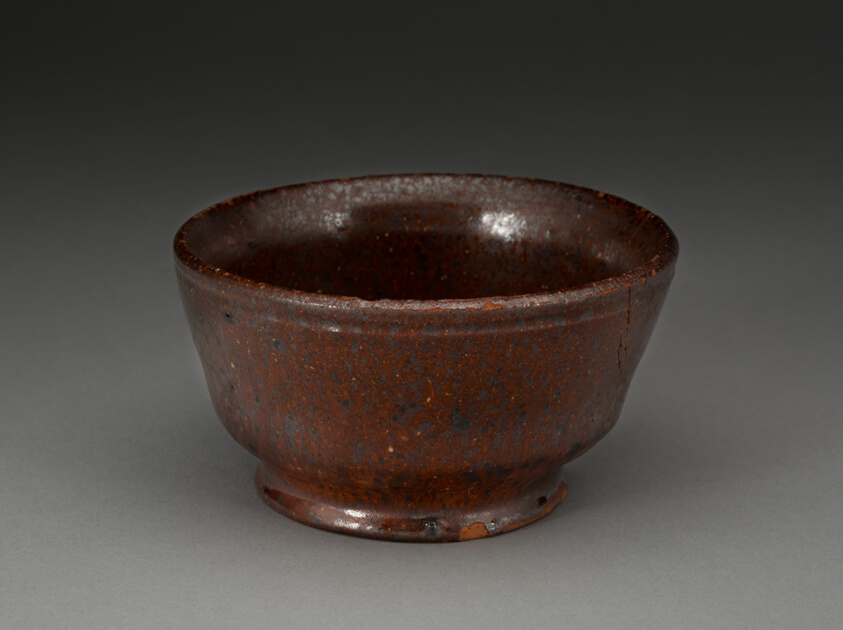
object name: Ceramics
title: Bowl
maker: Artist unknown (American, 19th century); Pennsylvania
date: 1810–50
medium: Earthenware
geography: Pennsylvania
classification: bowl; earthenware; ceramics; american decorative arts; american arts; decorative arts